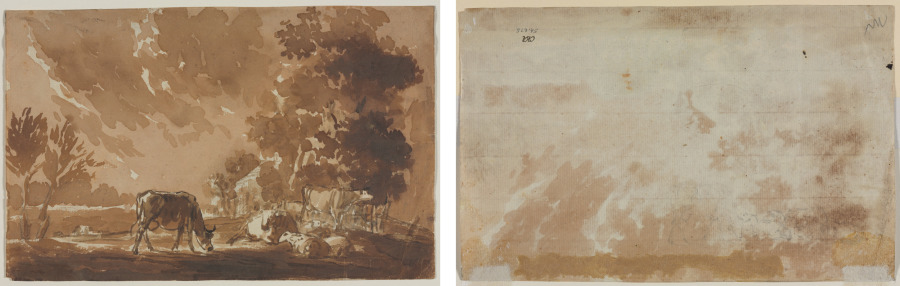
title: Landscape with Cattle (recto) Cattle (verso)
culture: France, 19th century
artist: Jules Dupré (French, 1811–1889)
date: second or last third 1800s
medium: brush and brown wash over graphite; framing lines in graphite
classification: Drawing